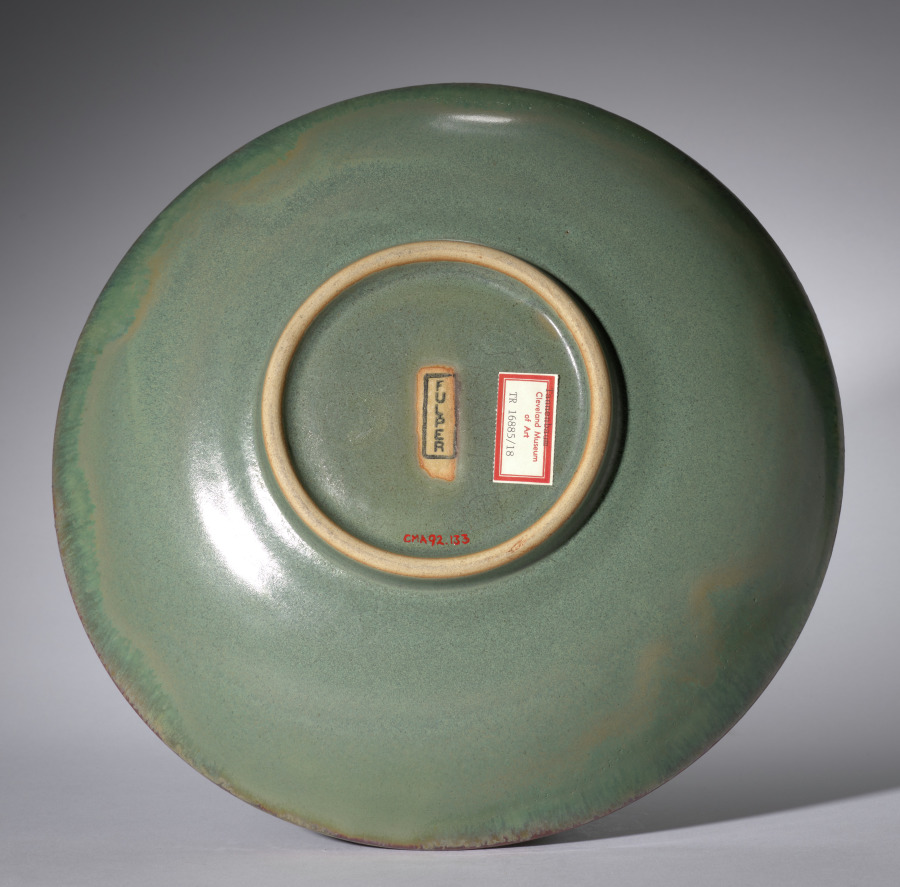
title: Bowl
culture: America, New Jersey, 20th century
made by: Fulper Pottery (American)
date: c. 1910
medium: stoneware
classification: Ceramic